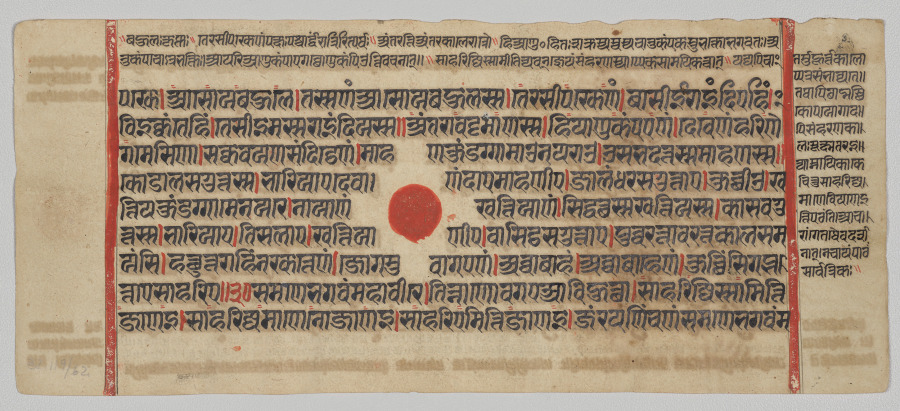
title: Text, Folio 13 (recto), from a Kalpa-sutra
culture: Western India, Gujarat, last quarter of the 15th century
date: c. 1475–1500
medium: Gum tempera, ink, and gold on paper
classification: Painting